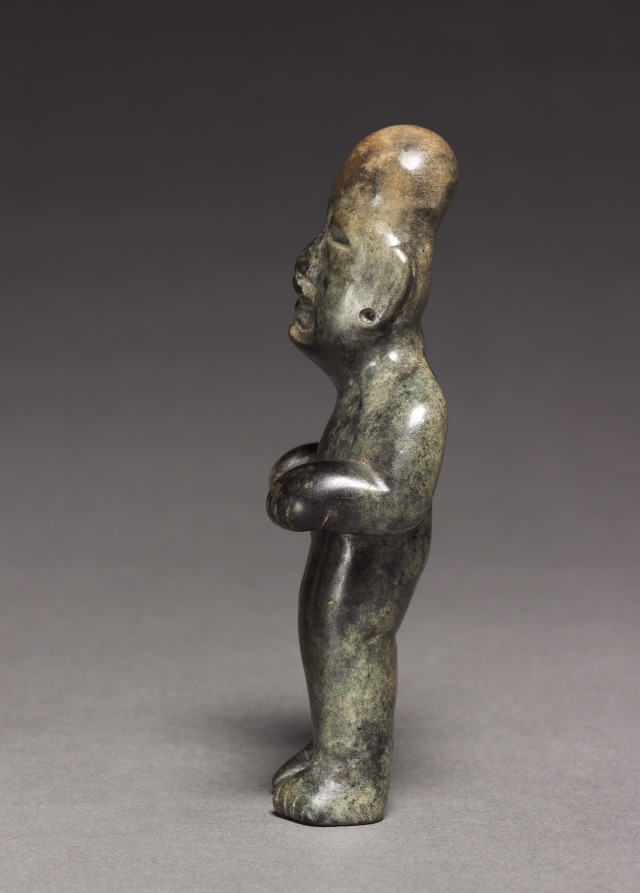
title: Standing Figure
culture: Mesoamerica, Mexico, Olmec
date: c. 900–400 BCE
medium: serpentine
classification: Sculpture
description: The Olmec were Mesoamerica's greatest lapidaries; their work in jade and serpentine was prized by both contemporary and later Mesoamerican cultures. Human beings were jaguar traits (such as the downturned mouth and paw-like hands of this figurine) are common in Olmec art. Such creatures were probably believed to possess supernatural powers.